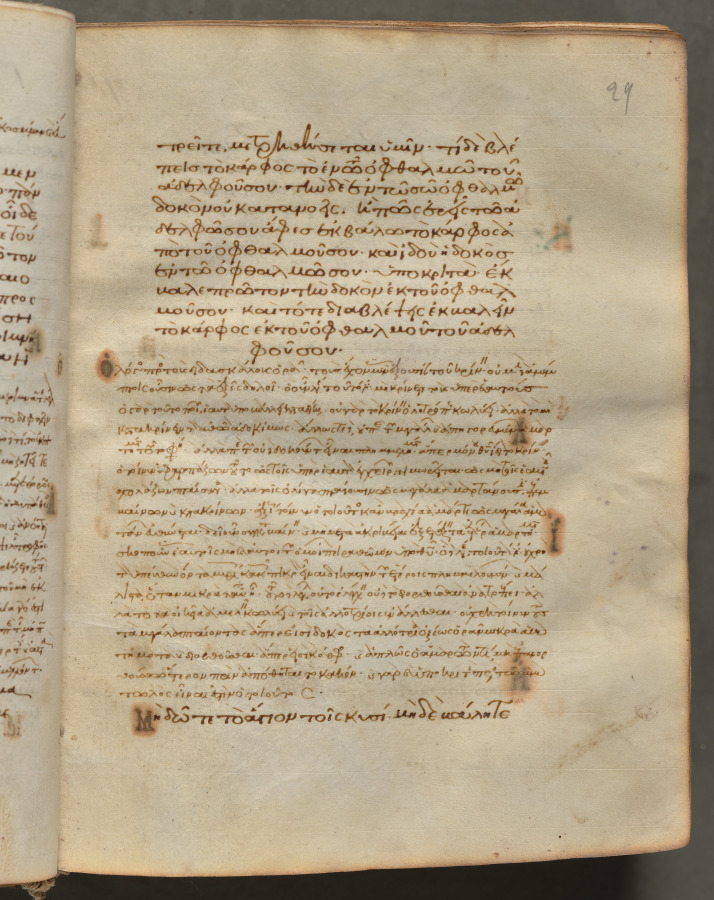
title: Text, folio 29 (recto), from a Gospel Book with Commentaries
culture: Byzantium, Constantinople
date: c. 1000–1100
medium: ink, tempera, and gold on vellum; leather binding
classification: Bound Volume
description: Each of the four gospels in this book opens on a page with brilliantly illuminated borders depicting the author of the text as well as birds—principally peacocks, symbols of the immortality of the soul—and fountains, representing the fountain of life and the salvation of the soul. This volume consists of 428 leaves with texts in Greek. Its level of sophistication suggests that it was probably written and decorated in a monastery in Constantinople.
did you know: Gospel books were carried in procession through Byzantine churches.